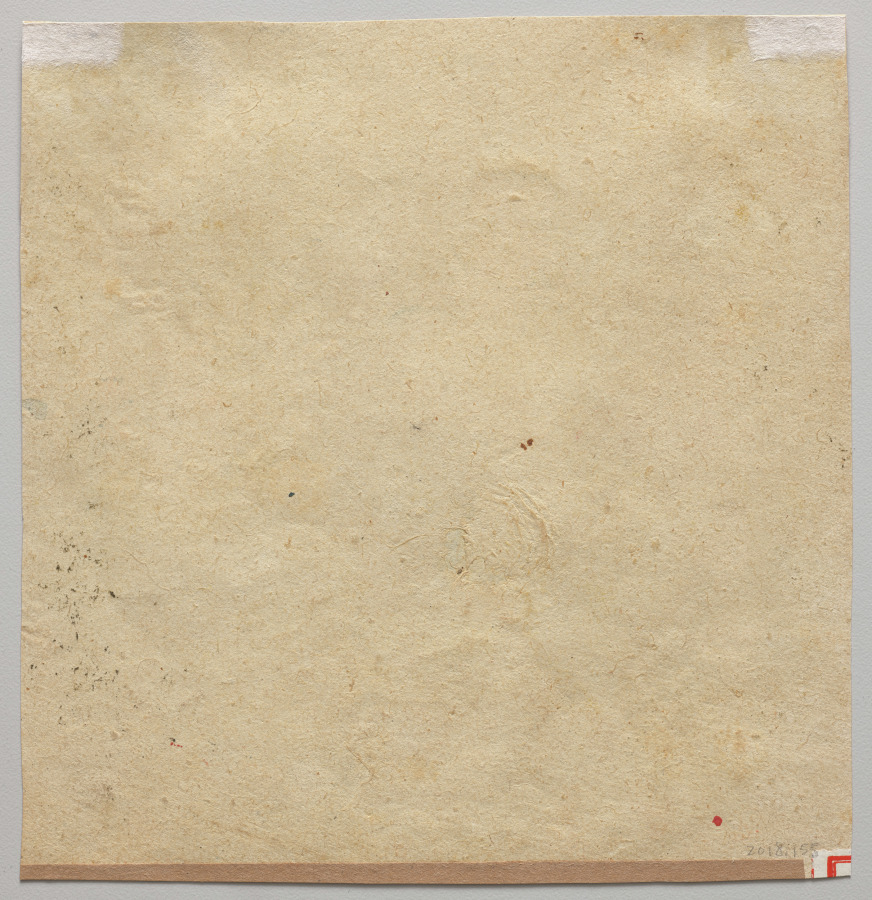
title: Vishnu on Ananta, the Endless Serpent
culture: Northern India, Himachal Pradesh, Pahari Region, Rajput Kingdom of Chamba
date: c. 1700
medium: Gum tempera and gold on paper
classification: Painting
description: Before the creation of the world, the god Vishnu was asleep on the serpent Ananta, floating on the cosmic ocean. When the time came for him to create the world, Vishnu’s wife Lakshmi woke him gently by massaging his feet. Then, out of his navel emerged a lotus flower, and Vishnu gave birth to Brahma, the god of creation. As plants that grow in water, lotus flowers indicate the presence of the waters and their life-affirming capacity. In this painting they are boldly distributed over a deep brown background with basket-weave patterning.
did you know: The artist has depicted Vishnu’s oceanic abode as a lotus pond.